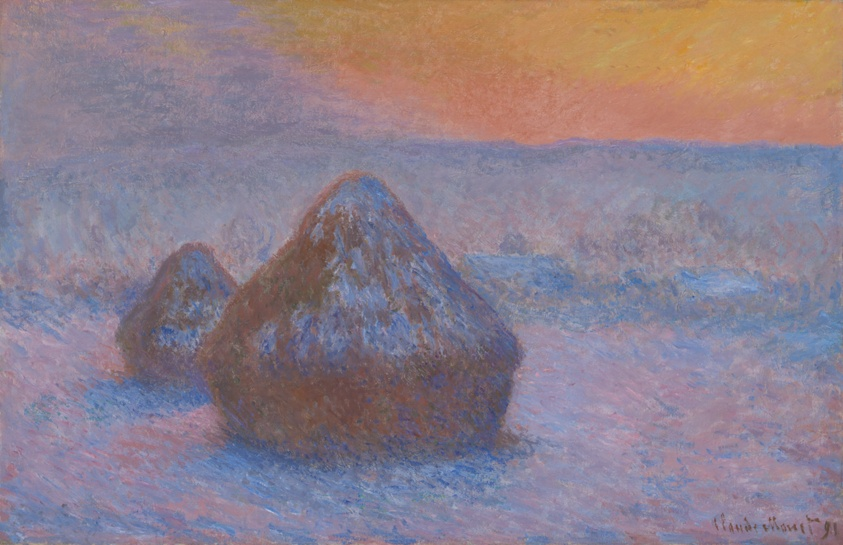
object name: Painting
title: Stacks of Wheat (Sunset, Snow Effect)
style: Impressionism, nineteenth century, 19th century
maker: Claude Monet (French, 1840–1926)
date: 1890–91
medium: Oil on canvas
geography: France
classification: oil on canvas; french; oil paintings (visual works); paint; painting; european painting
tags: seasons, yellow (color), rural life, purple (color), orange (color), nature, blue (color), weather/seasons, landscapes, winter